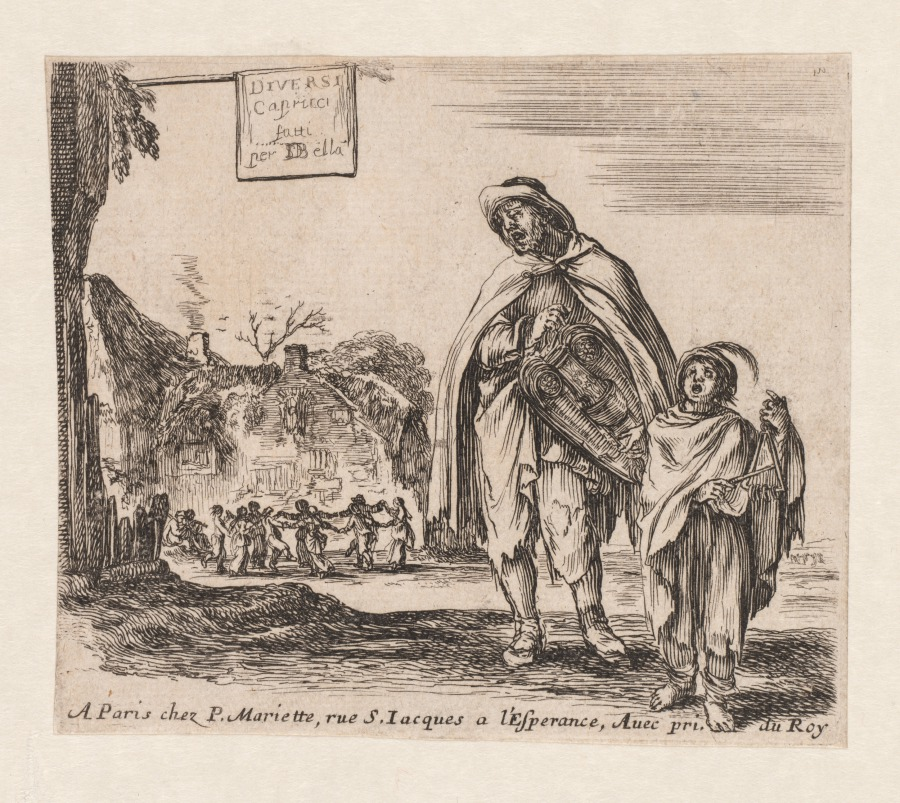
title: Title Page: Diversi Capricci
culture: Italy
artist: Stefano Della Bella (Italian, 1610–1664)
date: 1647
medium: Etching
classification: Print